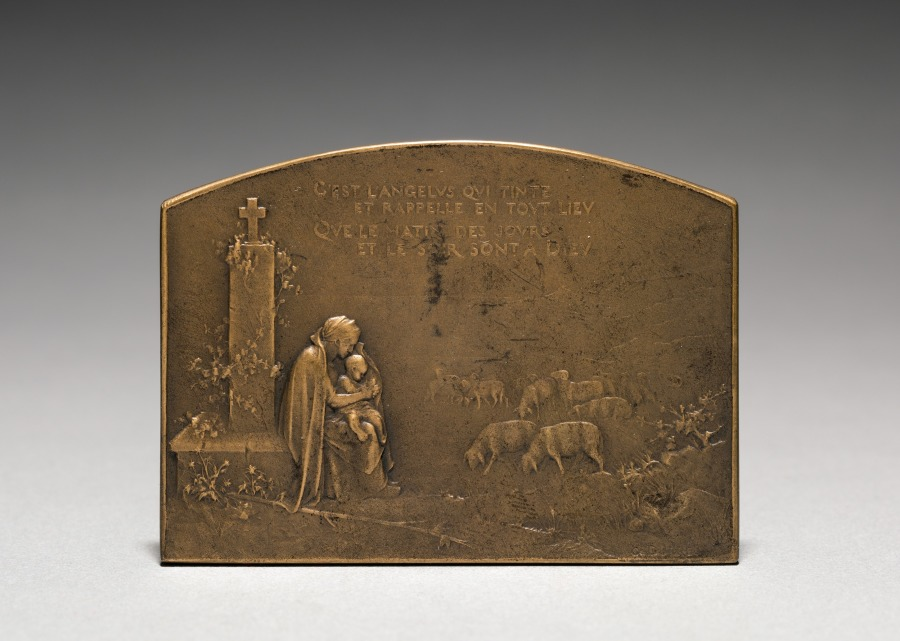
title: Medallion (reverse)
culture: France, 19th-20th century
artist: Jules Dupré (French, 1811–1889)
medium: bronze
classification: Metalwork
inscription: "C'est l'Angelus qui tinte et rappelle en tout lieu que le matin des jours et le soir sont à Dieu" (It is the Angelus which sounds and recalls in every place that the morning and evening of the days are for God); signed: "G. Dupré."